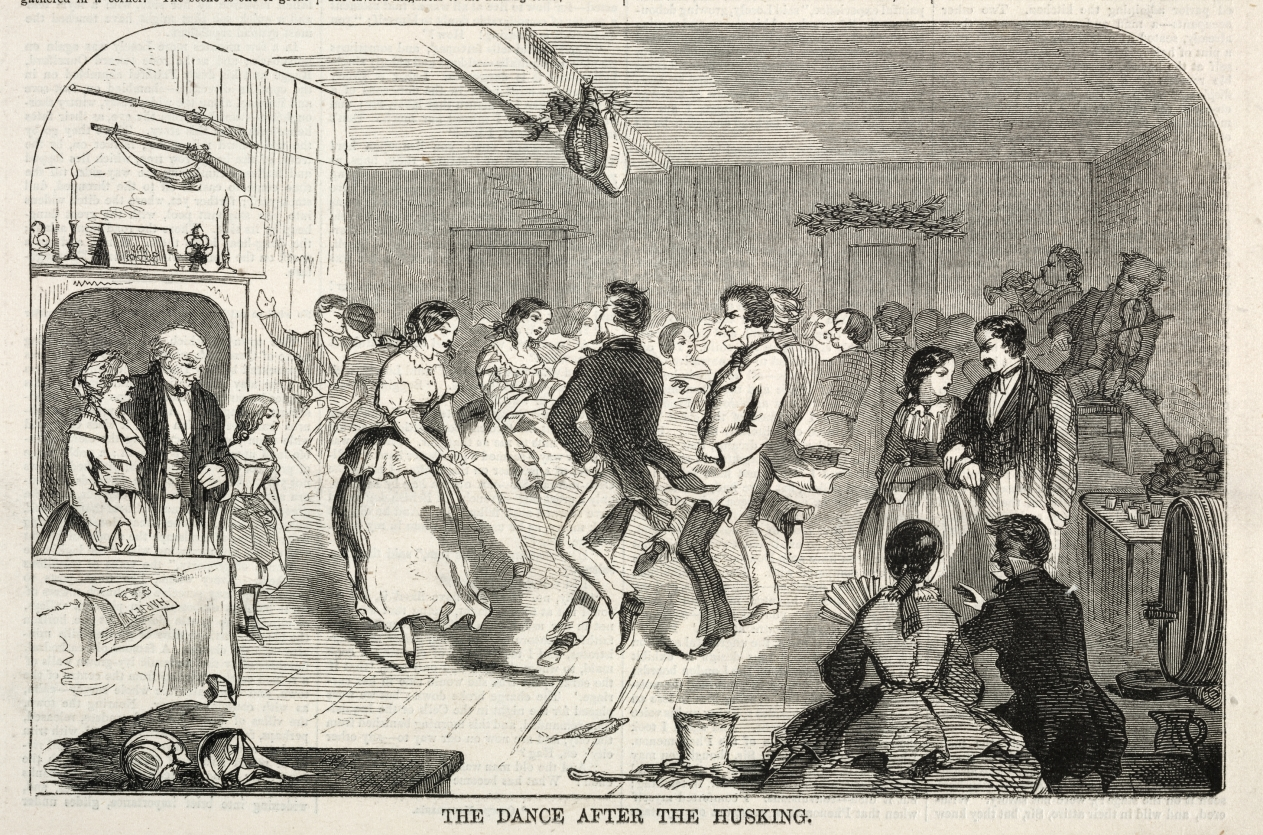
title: The Dance after the Husking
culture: America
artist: Winslow Homer (American, 1836–1910)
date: 1858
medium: wood engraving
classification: Print